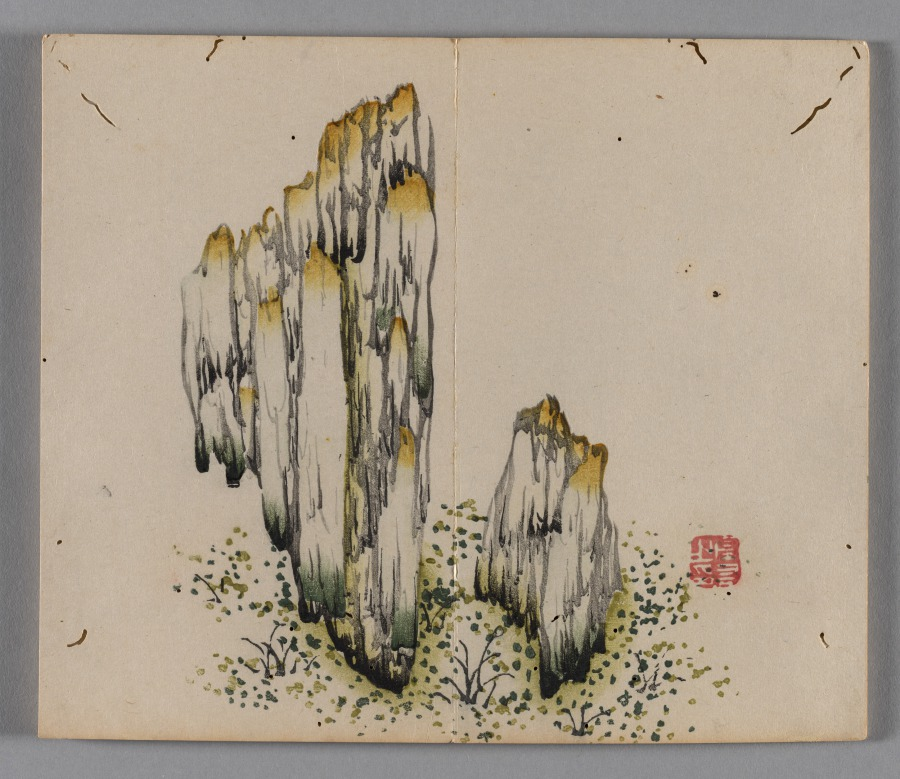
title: Ten Bamboo Studio Collection of Calligraphy and Painting: Miscellaneous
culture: China, Qing dynasty (1644-1911)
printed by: Hu Zhengyan (Chinese, c. 1584–1674)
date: 1633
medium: Woodblock-printed book; ink and colors on paper; first edition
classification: Print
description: Color printing reached a level of perfection in the early 1600s, as seen in this Ten Bamboo Studio Collection of Calligraphy and Painting and the Mustard Seed Garden Manual of Painting (printed 1679 and 1701). The painterly quality, precision in registering (aligning) the woodblocks, and harmonious colors made them the most successful color print editions in Chinese history. Both editions were printed and compiled in Nanjing, spread nationwide, and had a great impact on the arts in Japan and Korea.